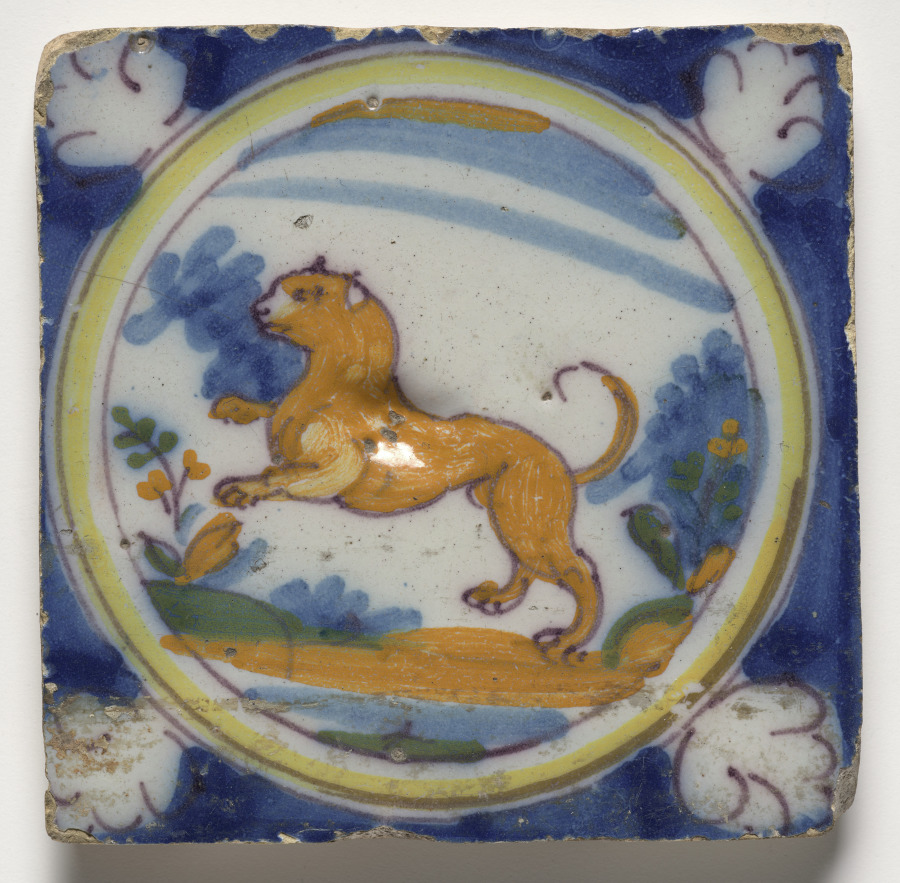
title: Wall Tile–Rampant Lion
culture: Spain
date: c. 1600s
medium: glazed ceramic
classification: Ceramic